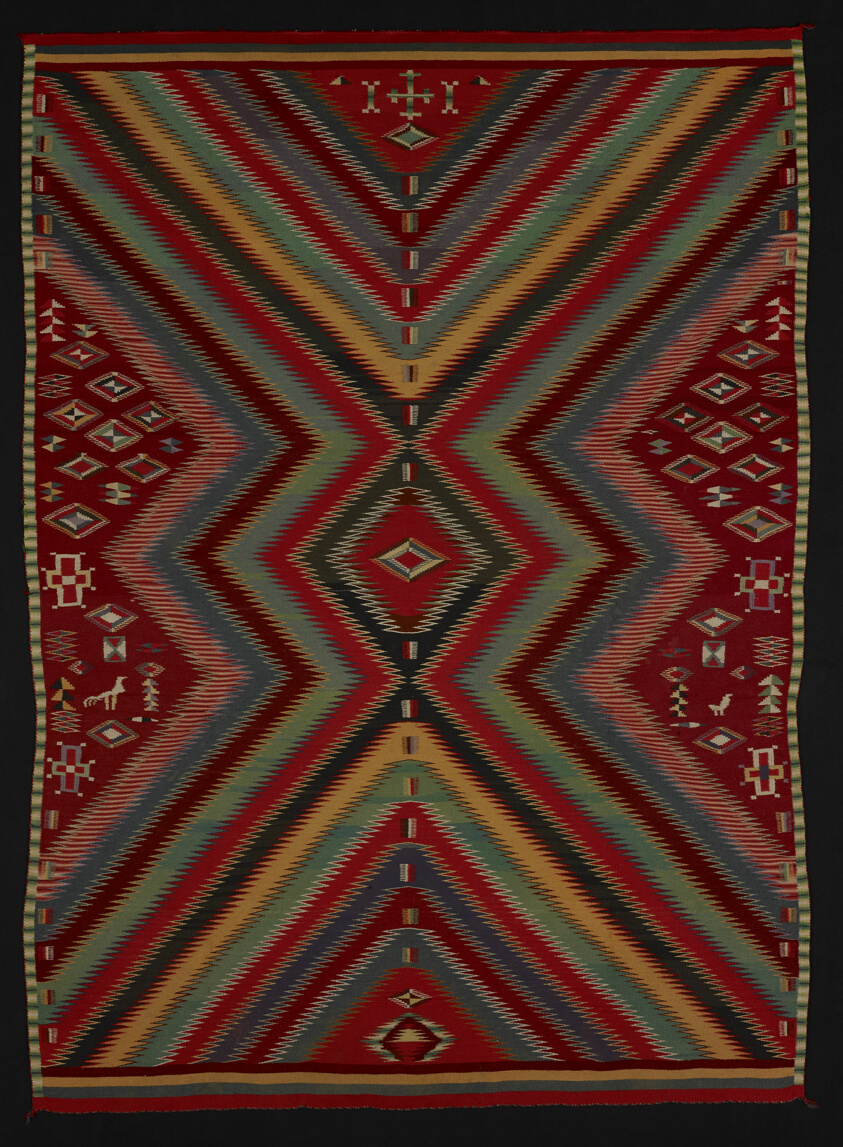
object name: Textile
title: "Eye-Dazzler" Weaving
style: navajo, native american, americas, Folk Art, 19th century, indigenous, north american, native north american, eye-dazzler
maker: Navajo (Diné) (Arizona, New Mexico, and Utah, United States)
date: 1880/1900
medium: Cotton and wool, single interlocking tapestry weave; twined selvages and heading, overcast finish terminating in tassels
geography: Navajo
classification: textile; weaving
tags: geometric, zigzags